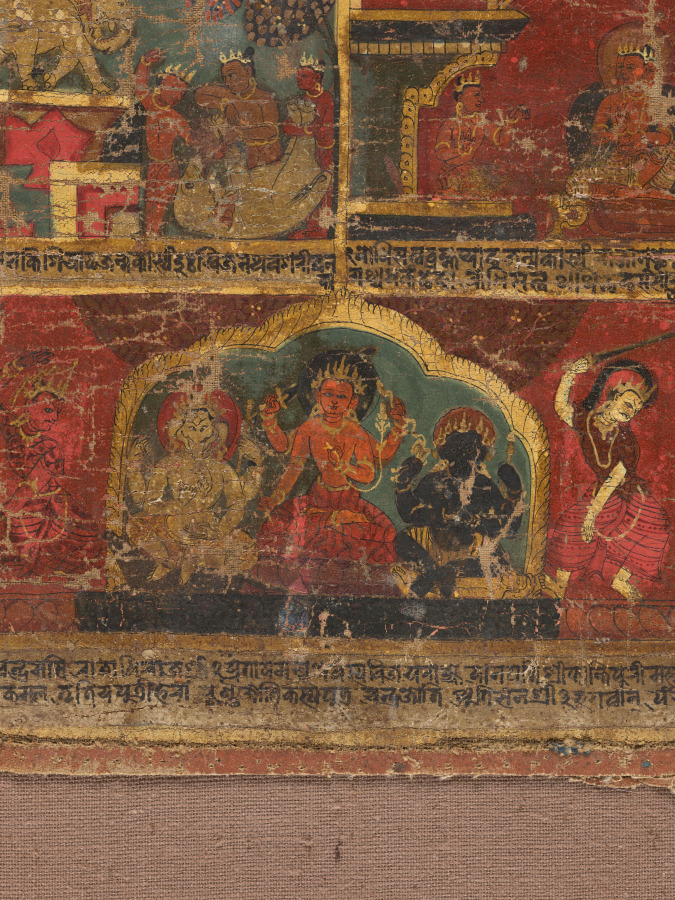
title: Bejeweled Buddha Preaching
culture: Nepal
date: 1648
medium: Gum tempera, ink, and gold on cloth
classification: Painting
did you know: Nepalese devotional paintings on cloth are called "paubha" in the Newari language.